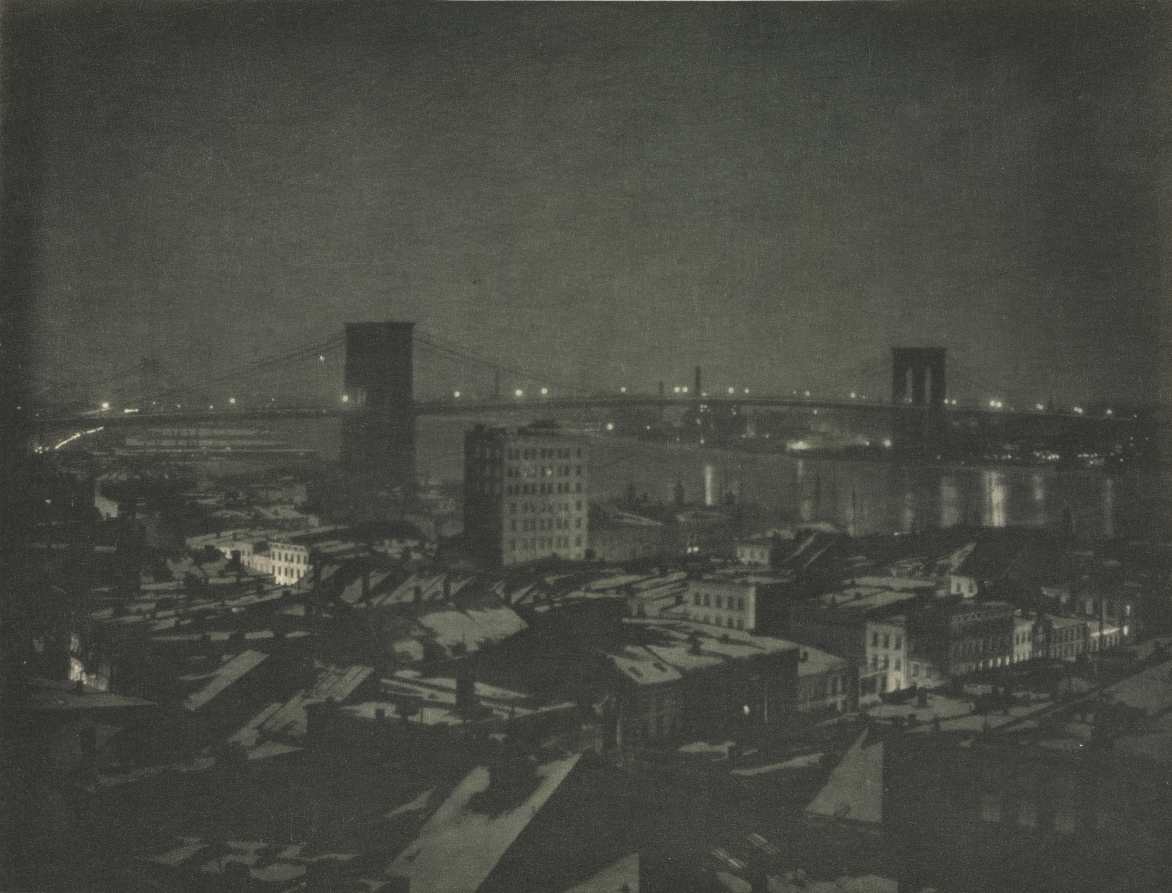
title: Camera Work: The Bridge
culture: America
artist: John Francis Strauss (American)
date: 1903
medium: photogravure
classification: Bound Volume